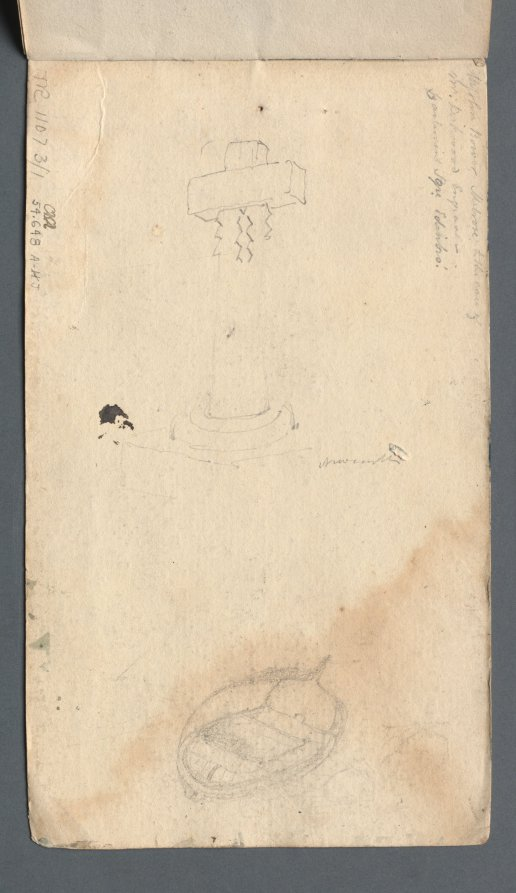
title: Sketchbook: Study of Cross and Rowboat (on back cover)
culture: England, 19th century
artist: Samuel Prout (British, 1783–1852)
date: 1814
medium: graphite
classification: Bound Volume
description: John Ruskin (also in this gallery) admired Prout’s strength as a draftsman. Like the topographical watercolorists of the 18th century, Prout emphasized form over color in his watercolors, as is evident in the monochromatic, delicate English views in this sketchbook.